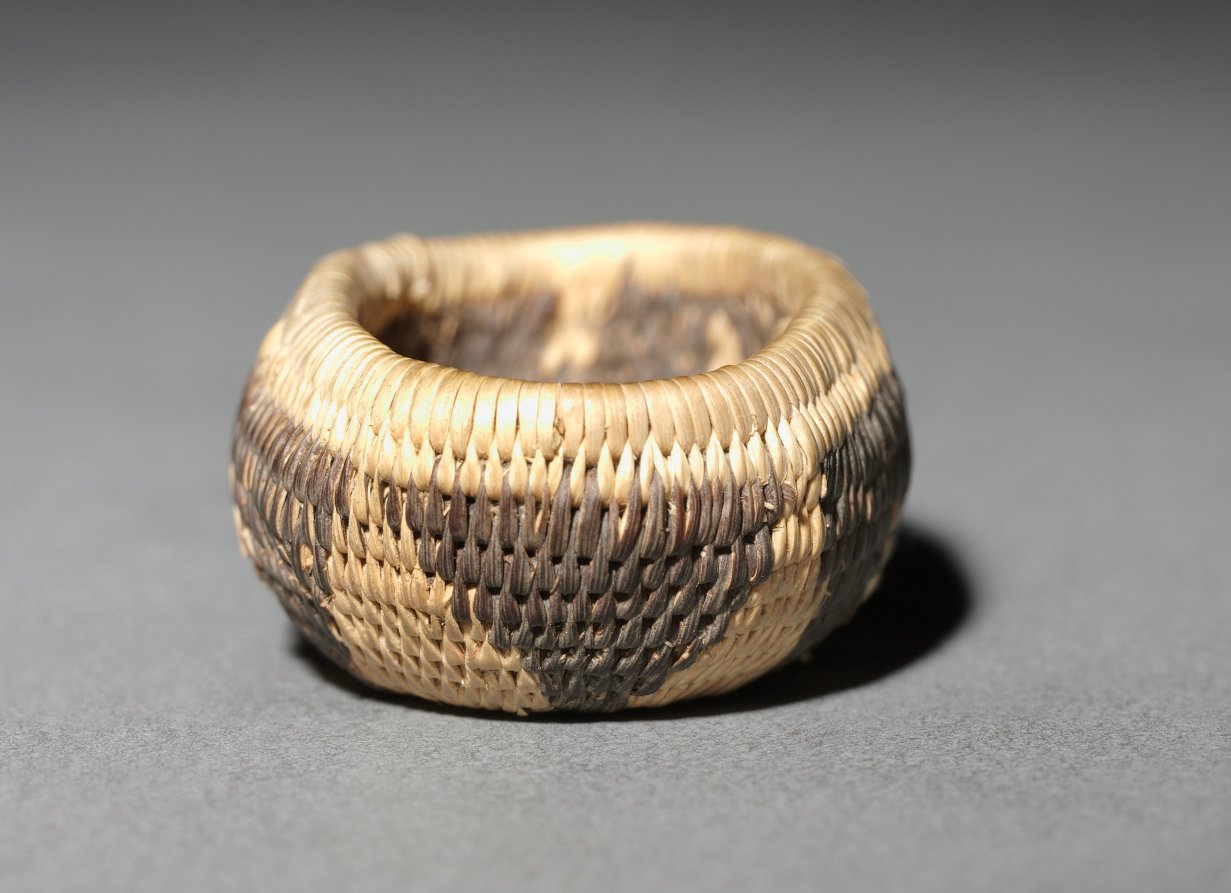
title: Miniature Basket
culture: America, Native North American, Southwest, Arizona, Akimel O'odham (Pima), Unassigned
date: before 1923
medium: plant fiber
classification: Basketry